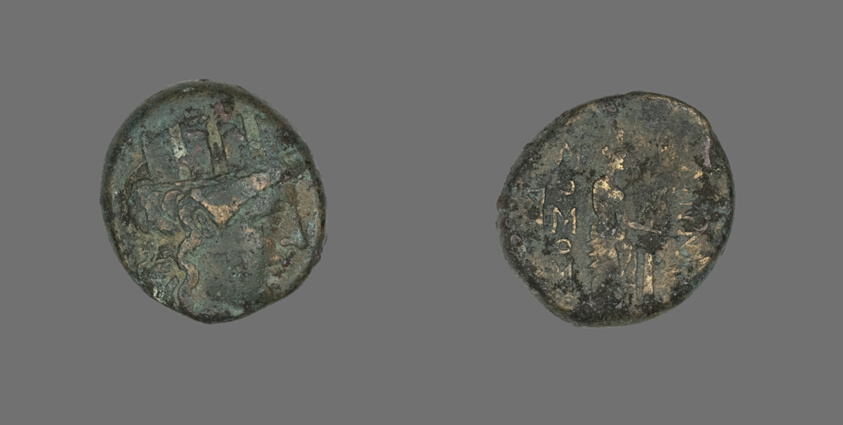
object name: Coin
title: Coin Depicting the Goddess Kybele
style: greek, ancient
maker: Greek; Smyrna, Ionia (now Izmir, Turkey)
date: 2nd-1st century BCE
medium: Bronze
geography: Smyrna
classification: coin; ancient art